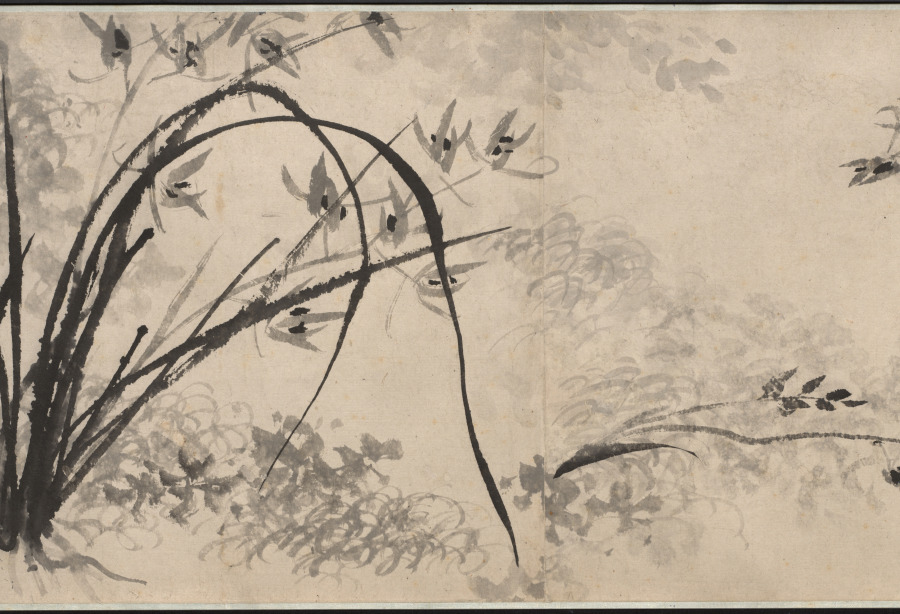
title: Rocks, Orchid, and Bamboo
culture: China, Qing dynasty (1644-1911)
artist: Shitao (Chinese, 1642–1707)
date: 1662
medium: handscroll; ink on paper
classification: Painting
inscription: Title colophon in four characters with signature and two seals on gold-flecked paper.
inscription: Artist's signature, inscription (with date of 1662), five seals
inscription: Colophon with two seals.